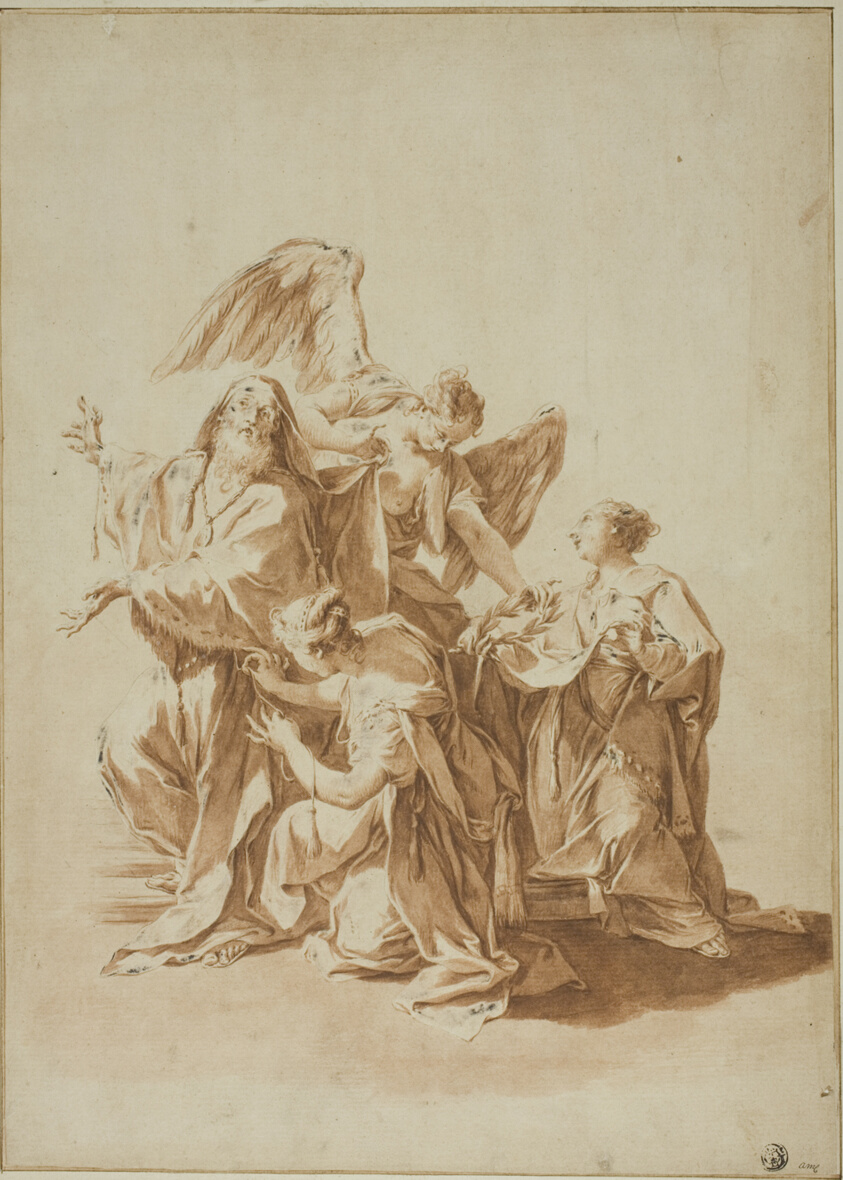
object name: Drawing and Watercolor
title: Epitaph of Charles Sackville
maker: After Giovanni Battista Pittoni, the younger; Italian, 1687-1767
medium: Brush and red brown wash, heightened with white gouache, over traces of black chalk on ivory laid paper, laid down on cream laid card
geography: Italy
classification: ink or chalk wash; drawings (visual works); prints and drawing